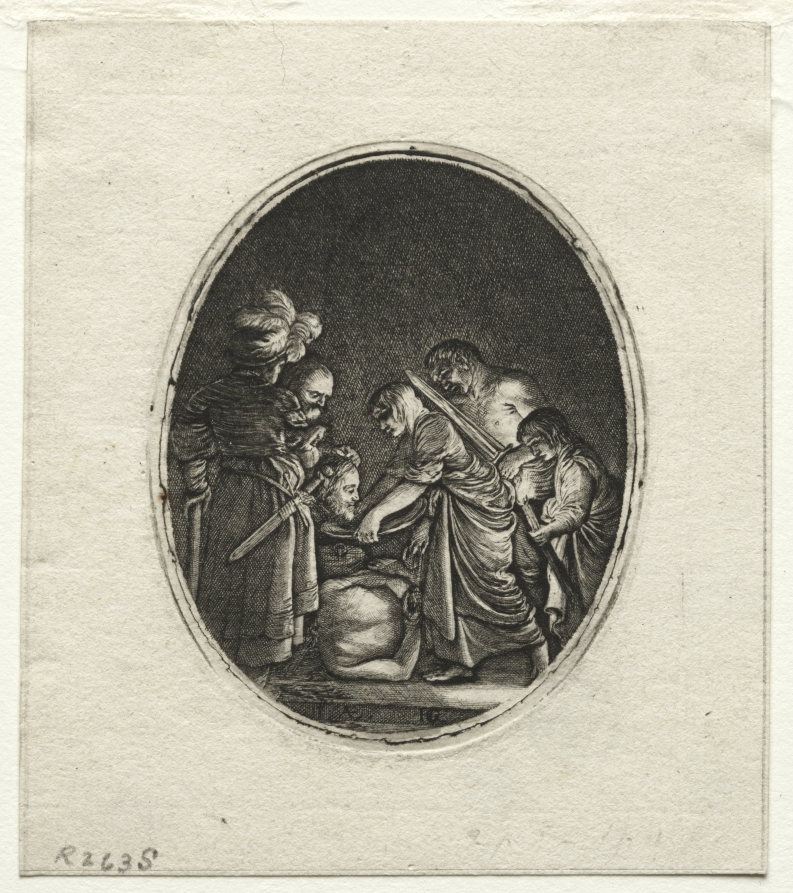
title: The Beheading of Saint John the Baptist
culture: Netherlands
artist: Hendrik Goudt (Dutch, 1583–1648)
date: c. 1610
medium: engraving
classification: Print